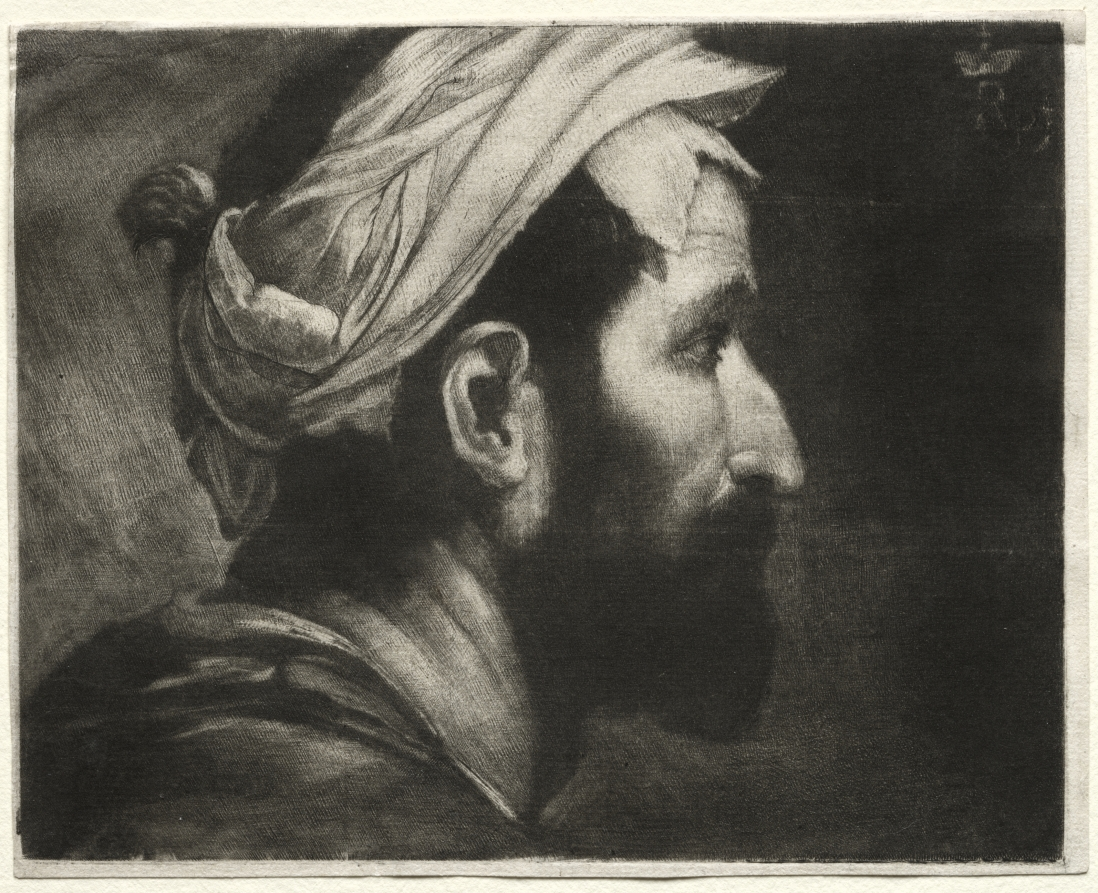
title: The Little Executioner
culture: Germany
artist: Prince Ruprecht (German, 1619–1682)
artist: after Jusepe de Ribera (Spanish, 1591–1652)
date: 1662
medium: mezzotint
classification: Print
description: Prince Ruprecht of the Rhine—a nobleman who was the nephew of England’s King Charles I—was among the earliest practitioners of mezzotint, a printmaking technique first used in Germany in the 1600s. Prince Ruprecht is credited with bringing the technique to England around 1660, where he introduced it to John Evelyn, who was engaged in writing a book on the history of printmaking. Ruprecht created this image (after a painting thought to be by Jusepe de Ribera) to illustrate the mezzotint process in Evelyn’s book, making it the first mezzotint printed in England.